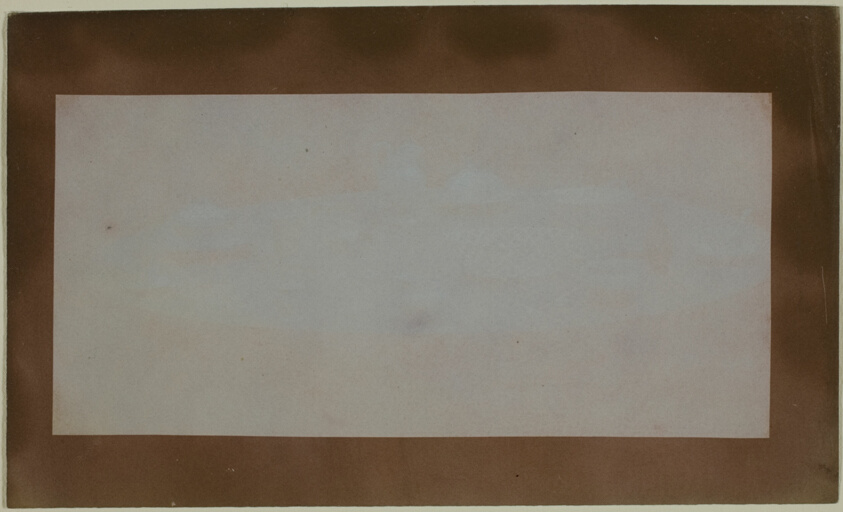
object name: Photograph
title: Table Set For Tea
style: 19th century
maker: William Henry Fox Talbot (English, 1800–1877)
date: c. 1840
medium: Photogenic drawing print from photogenic drawing negative, stabilized (fixed) in potassium iodide or potassium bromide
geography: England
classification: salted paper print; photographic process; photography; photograph